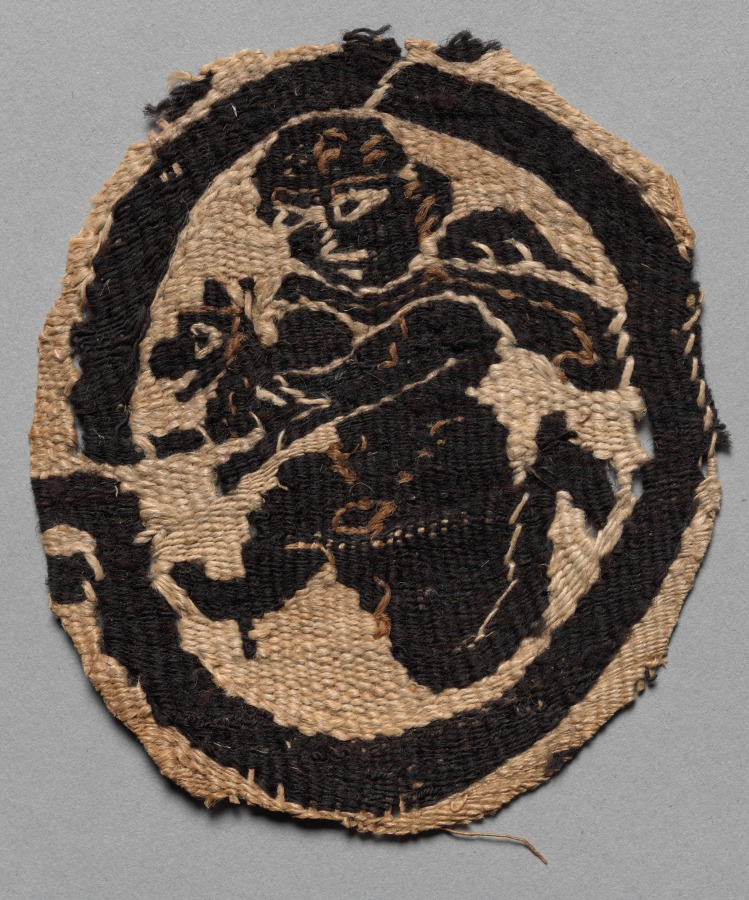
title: Fragment with Running Figure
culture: Egypt, Byzantine period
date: 500s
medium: tapestry; linen and wool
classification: Textile